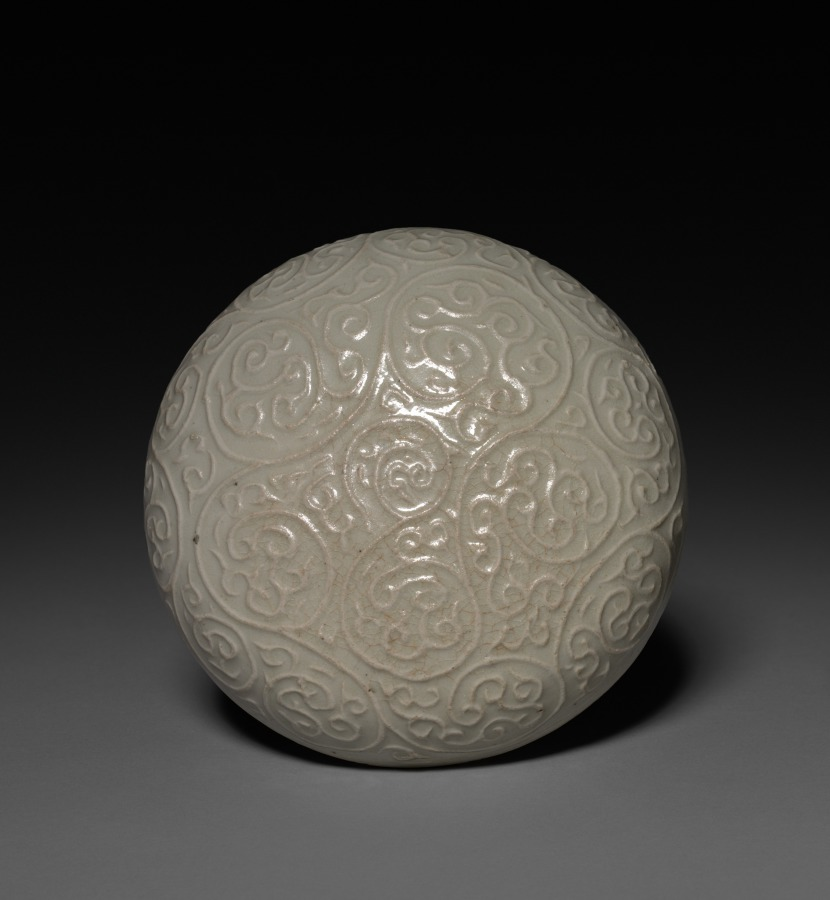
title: Round Covered Box with Floral Scrolls in Relief: Qingbai type Ware (lid)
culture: China, Fujian province, Anxi xian, Yuan dynasty (1271-1368)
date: 1300s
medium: glazed porcelain with slip decoration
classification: Ceramic